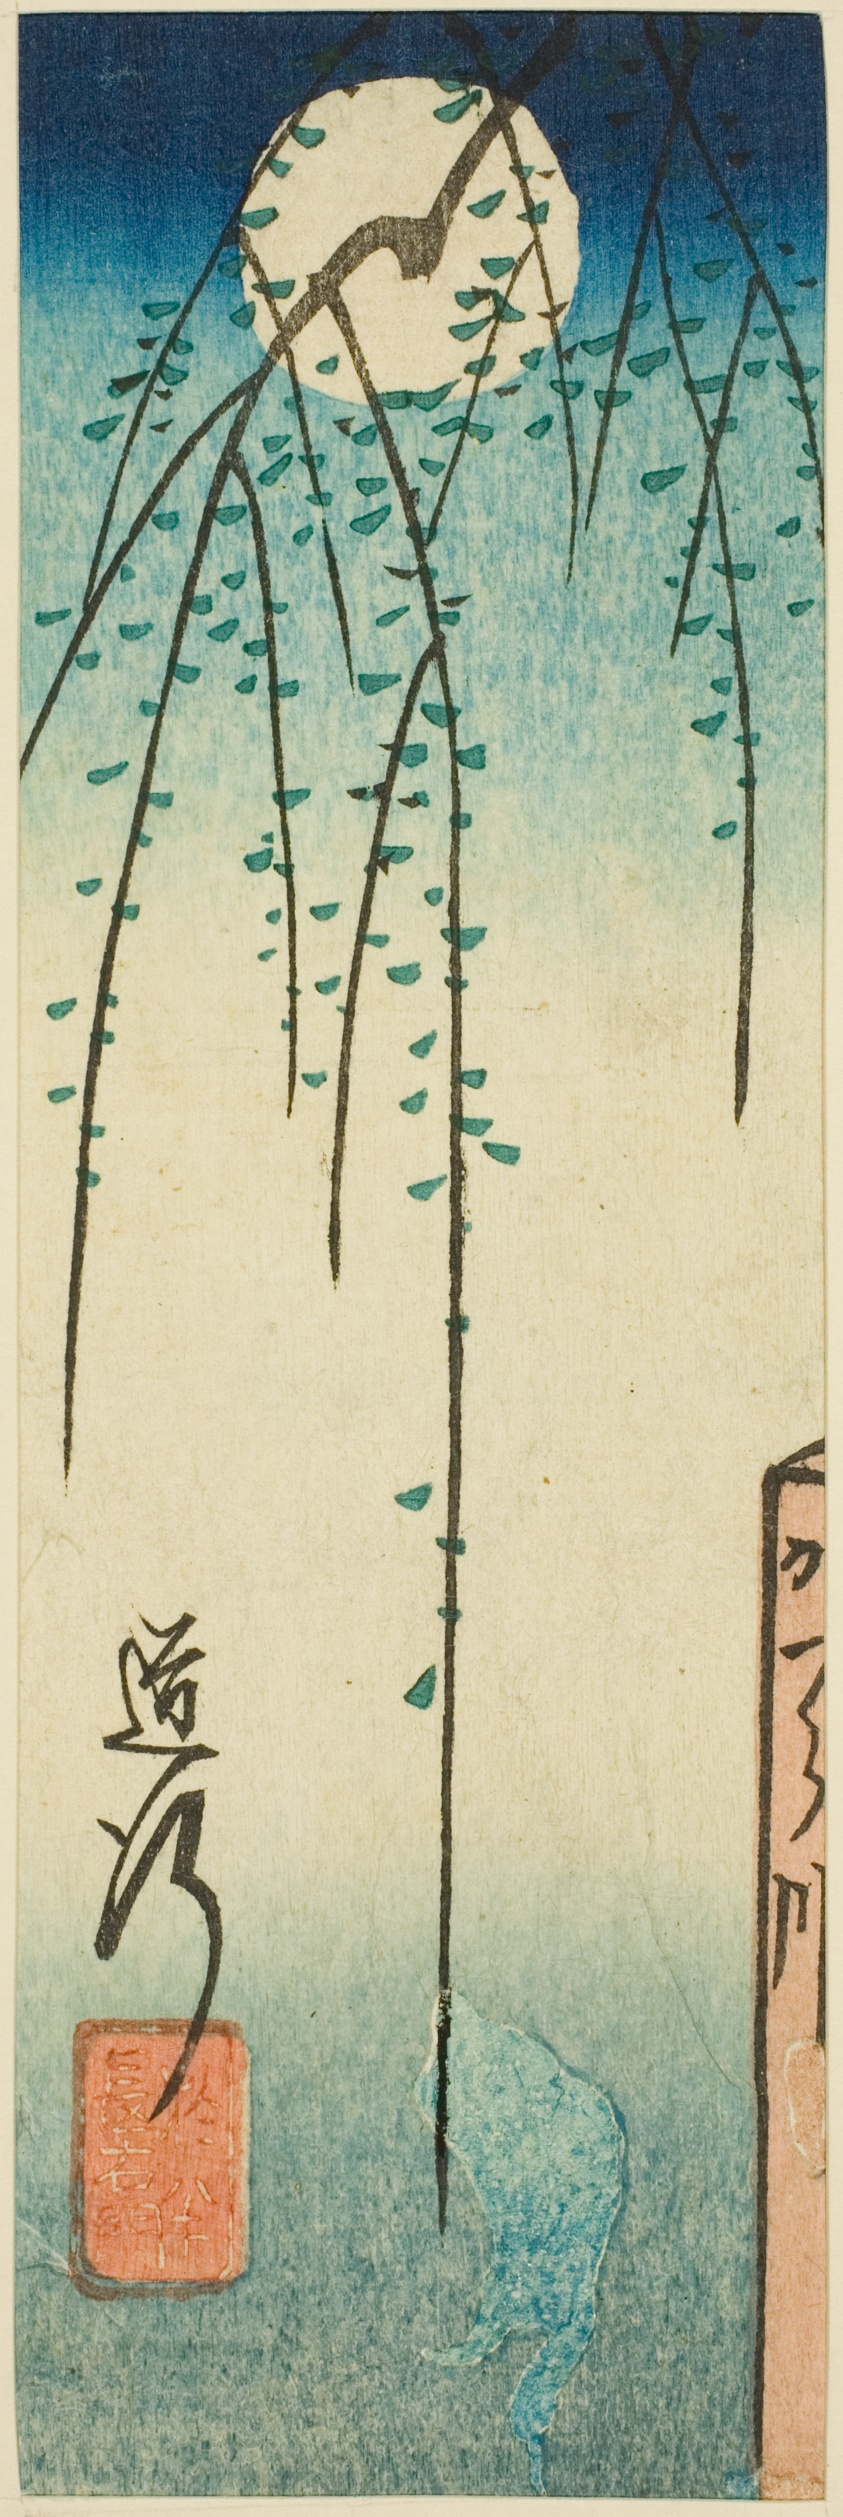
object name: Print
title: The Michiyuki Scene from the play Ohan and Choemon (Michiyuki, Ohan Choemon), section of a sheet from the series "Reflections of Dramas in Cutouts (Harimaze joruri kagami)"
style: Japanese (culture or style)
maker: Utagawa Hiroshige 歌川 広重; Japanese, 1797-1858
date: 1854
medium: Color woodblock print; section of harimaze sheet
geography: Japan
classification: woodblock print; print; asian art